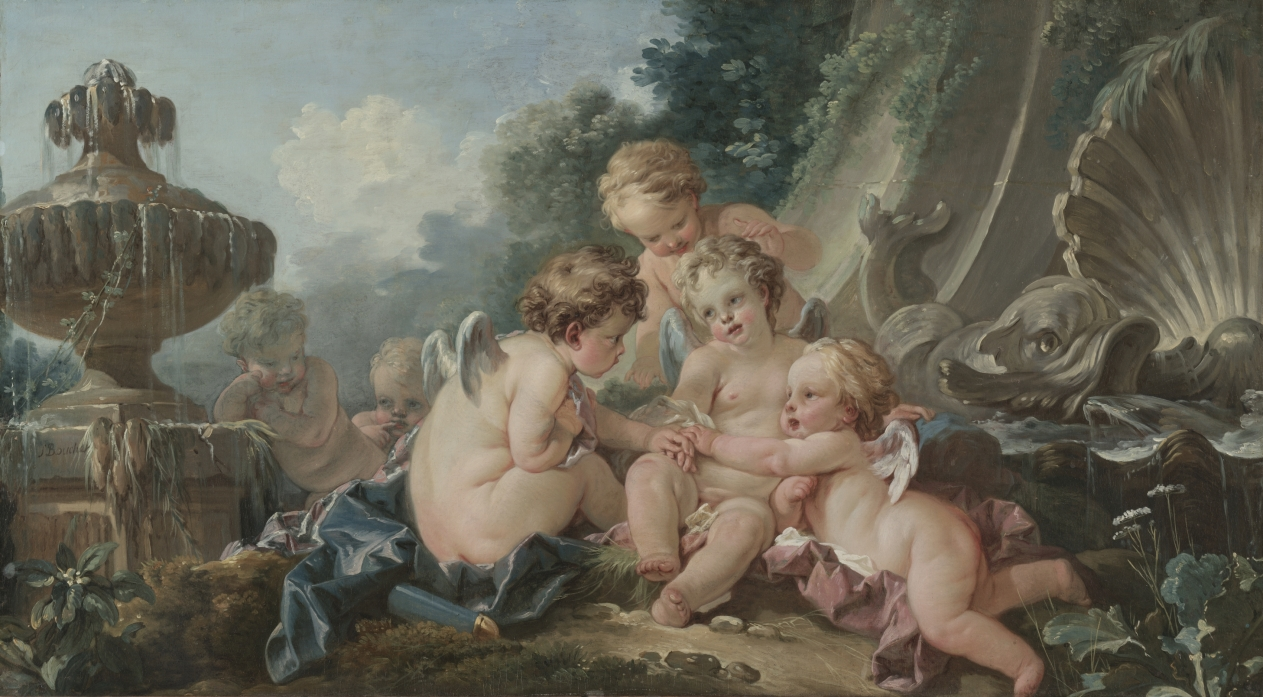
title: Cupids in Conspiracy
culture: France, 18th century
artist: François Boucher (French, 1703–1770)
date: 1740s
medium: oil on canvas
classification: Painting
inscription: Signed left: "F Boucher"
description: Along with Music and Dance (1948.181.1), this work is surely part of a series of over-door paintings that would have been installed in a house. However, where the panels were originally installed or who commissioned them remains unknown. They exemplify the fusion of fine arts and decorative arts that was common in elite interior design in 18th-century France. Even though the paintings were part of the wall decoration of the room, the patrons chose François Boucher, a well-known painter of portraits and genre scenes, as well as mythological and religious subjects, to execute them. These two paintings reflect a style that was popular both at court and among other wealthy patrons through much of the eighteenth century: light, charming, pastoral scenes that mix classical elements with pure fantasy. Both of them feature putti, chubby baby characters that add a touch of humor to the images.